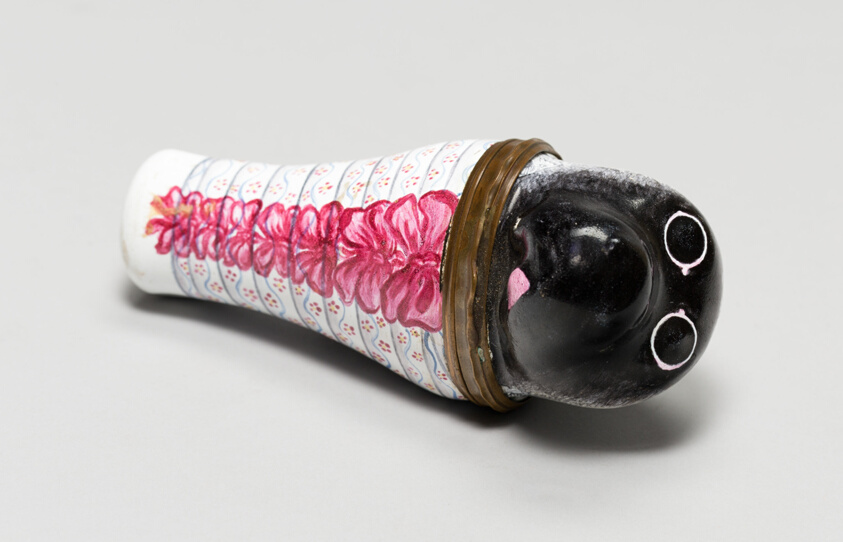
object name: Ceramics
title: Box in the Form of a Swaddled Dog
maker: England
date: c. 1770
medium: Enamel on copper with metal mounts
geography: England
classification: porcelain; ceramics; european decorative arts